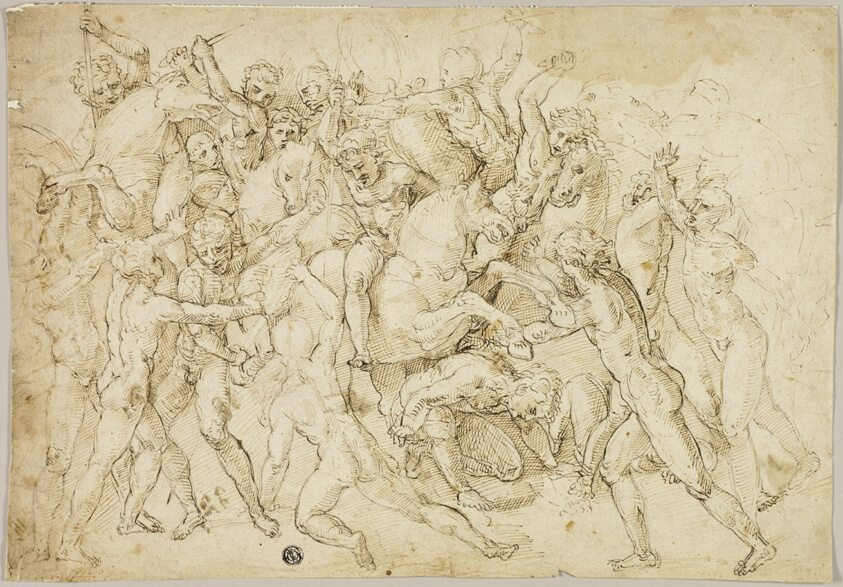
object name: Drawing and Watercolor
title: Battle between Cavalry and Foot Soldiers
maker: After Girolamo Genga; Italian, c. 1476-1551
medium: Pen and brown ink, over traces of graphite, on ivory laid paper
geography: Italy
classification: pen and ink drawings; drawings (visual works); prints and drawing